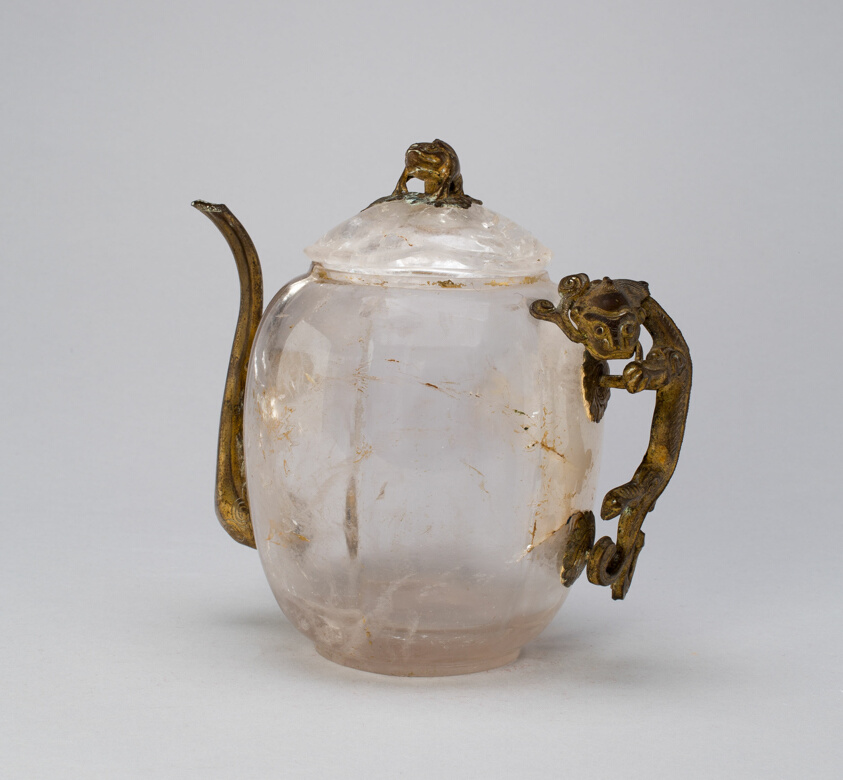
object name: Vessel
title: Covered Ewer with Lizard-Shaped Handle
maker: China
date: Qing dynasty (1644–1911), 18th century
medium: Crystal with carved decoration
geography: China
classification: ewer (vessel); glass; vessel; asian art